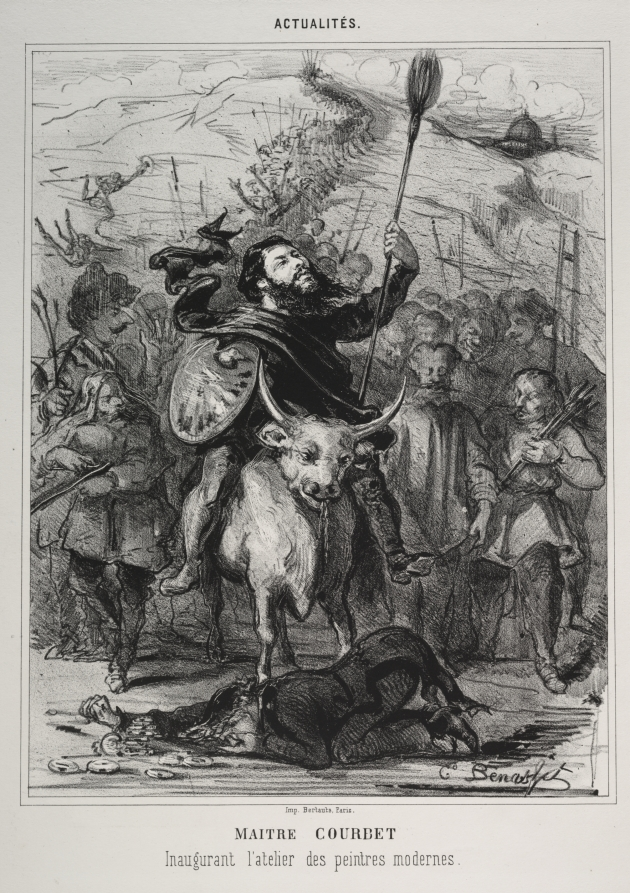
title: Actualities: Master Courbet Inaugurates the School of Modern Painting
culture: France, 19th century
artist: Émile Bénassit (French, 1833–1902)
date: c. 1859–77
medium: lithograph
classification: Print